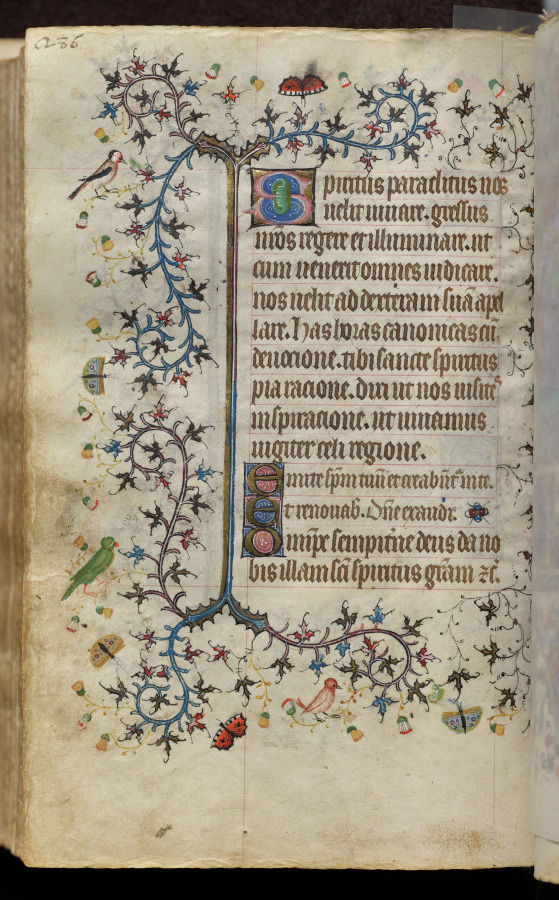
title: Hours of Charles the Noble, King of Navarre (1361-1425): fol. 143v, Text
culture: France, Paris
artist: Master of the Brussels Initials and Associates (French)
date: c. 1405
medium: ink, tempera, and gold on vellum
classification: Bound Volume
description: This precious volume was obviously highly prized by its owner, the French-born King of Navarre, who had his coat of arms painted on no less than twenty folios. Rather than directly commissioning this manuscript from a specific workshop, it seems that Charles the Noble acquired his book of hours -- perhaps ready-made for the luxury market -- while on a trip to Paris in 1404-05. A collaborative effort, six painting styles are evidenced within the pages of this codex, those of two Italians, two Frenchmen, and two Netherlanders. The painter who was responsible for the planning and decoration of the book, and who produced seventeen of the large miniatures, was a Bolognese artist known as the Master of the Brussels Initials. His principal assistant, responsible for most of the borders, was a Florentine who signed his name "Zecho" da Firenze on folio 208 verso.